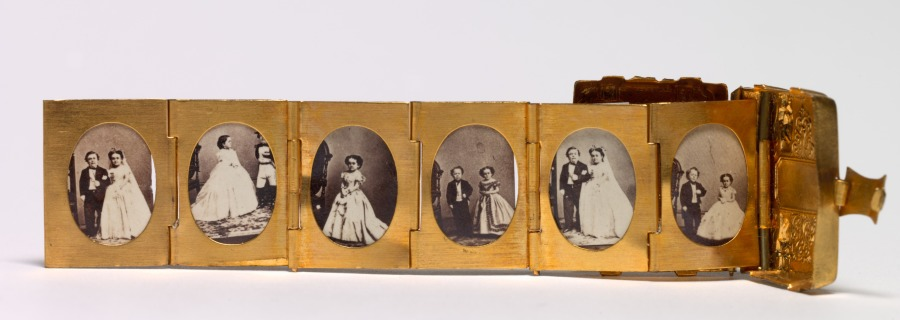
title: Somebody's Luggage (Miniature Wedding Album of Tom Thumb and Lavinia Warren)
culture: America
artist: Mathew Brady (American, 1823–1896)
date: c. 1863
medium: brass photographic locket with 12 miniature albumen prints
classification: Jewelry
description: This deluxe commercial souvenir commemorates the marriage of “General” Tom Thumb (Charles Sherwood Stratton) and Lavinia Warren, performers at P. T. Barnum’s American Museum. Thumb was such a celebrity that the wedding pushed the Civil War off newspapers’ front pages for days. Cartes-de-visite of the wedding sold in the thousands; Brady even licensed the image to lithographers and other photographers. In one image, Lavinia holds a baby who was borrowed for the photo shoot to suggest her domestic skills. The locket is shaped like a miniature suitcase bearing the words “Somebody’s Luggage,” the title of an 1862 story by Charles Dickens.